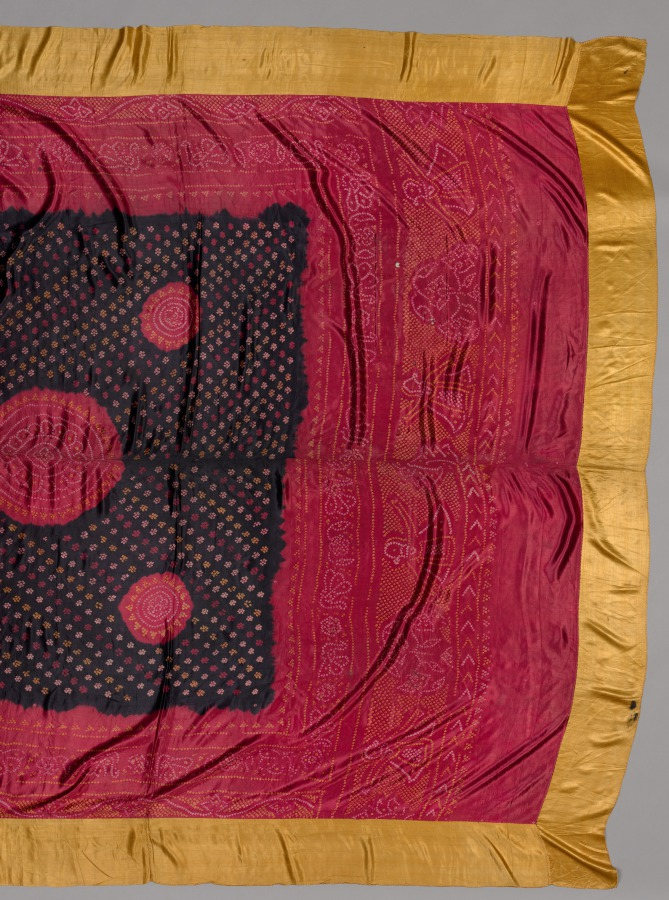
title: Indian Textile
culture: India, 19th - early 20th century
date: 1800s - early 1900s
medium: satin, tied and dyed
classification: Textile